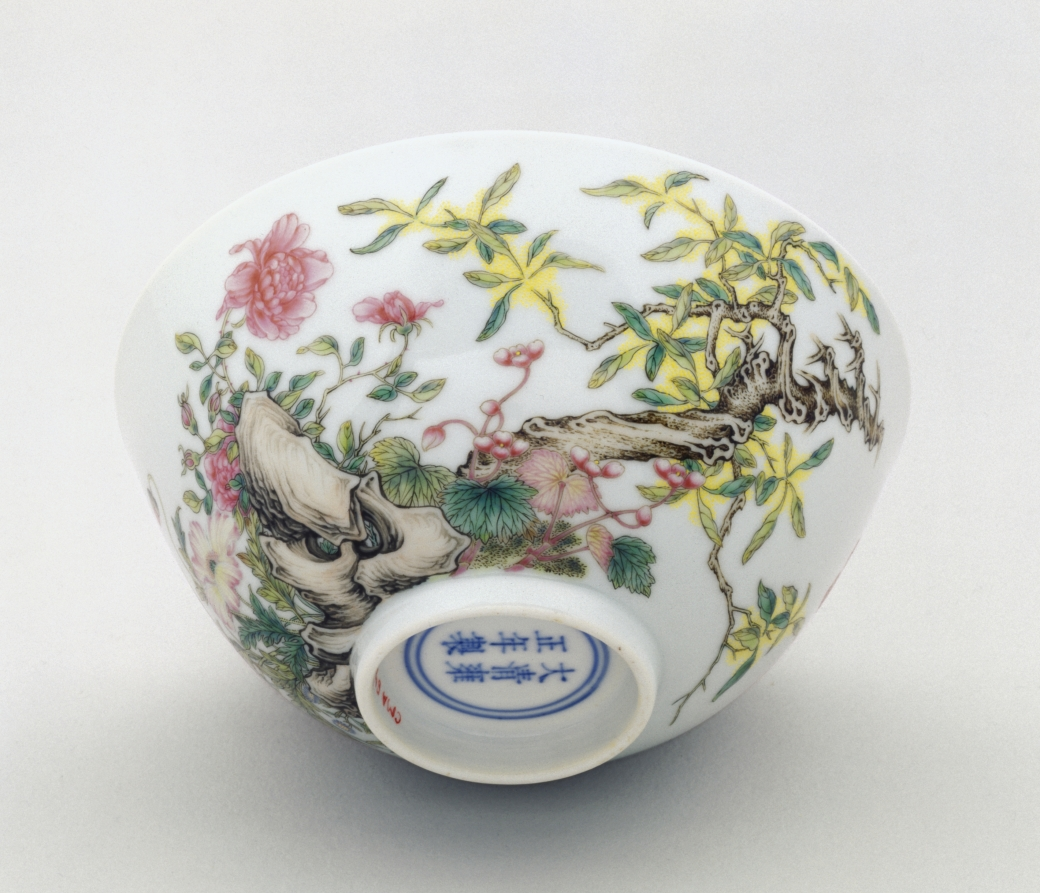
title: Bowl with Poppies, Tree Peony, and Flowering Mimosa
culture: China, Jiangxi province, Jingdezhen, Qing dynasty (1644-1911), Yongzheng mark and reign (1723-1735)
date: 1723–35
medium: porcelain with overglaze enamel decoration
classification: Ceramic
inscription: 大清雍正年制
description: Developments in enamel technology led to new possibilities in polychrome decoration. Pinks appeared, lending their name to the new palette of overglaze colors (famille rose), and the addition of opaque white allowed painters to vary the value of pigments, enhancing the painterly quality of porcelain decoration. As on painted scrolls and album leaves, the image is accompanied with a poem, in this case: "Branches come alive in the moonlight; Blossoms fill the autumn realms."